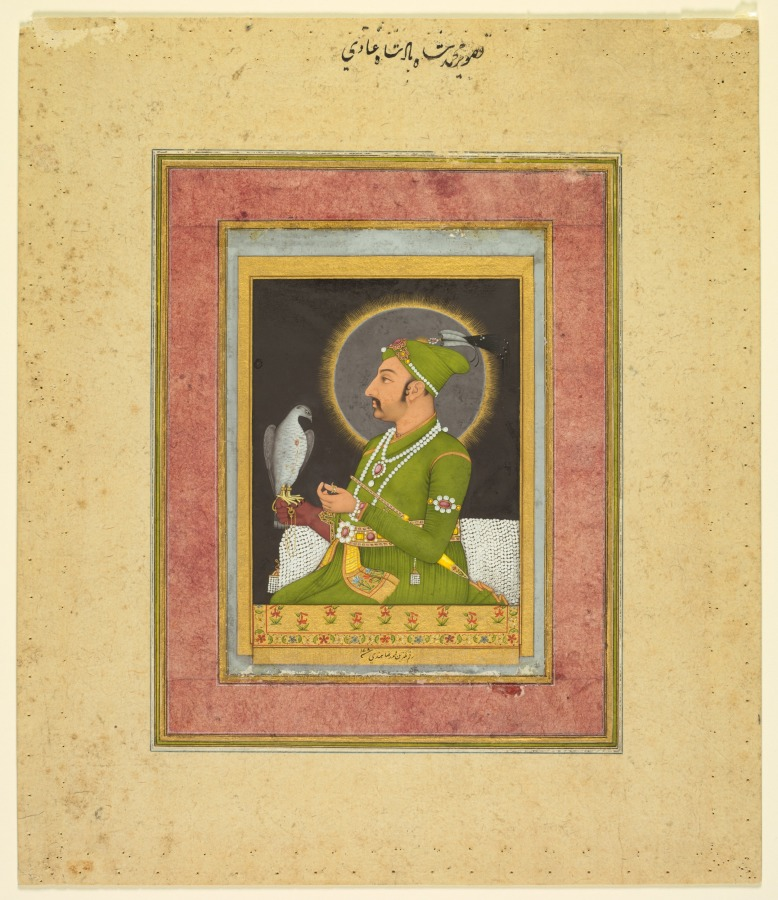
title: Posthumous portrait of the Mughal emperor Muhammad Shah (reigned 1719–1748) holding a falcon (recto)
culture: Mughal India, probably Uttar Pradesh, Lucknow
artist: Muhammad Rizavi Hindi (Indian, active mid-1700s)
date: 1764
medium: Gum tempera, ink, and gold on paper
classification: Painting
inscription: raqam-i kamtarin Muhammad Reza-i Hindi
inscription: tasvir Muhammad Shah Padshah Ghazi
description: The artist used the carpet, the floor cushion, and the halo to indicate the royal status of the seated figure. He has turned the picture plane into the space of a window, over the sill of which a golden carpet ornamented with a field of lilies marks his location for outsiders. His signature in Persian, the Mughal lingua franca, interrupts the fringed border. Painted after the emperor’s death and the dissolution of much of the Mughal court, this refined portrait pays tribute to the wealth and power of the imperial past.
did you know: The archer’s thumb ring is for drawing the bowstring. Perhaps he was left-handed.